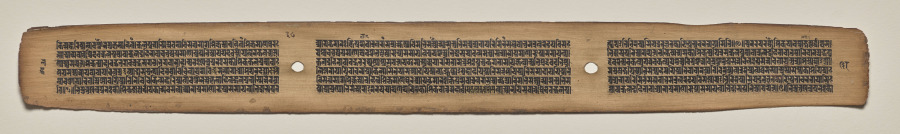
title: Text, Folio 38 (verso), from a Manuscript of the Perfection of Wisdom in Eight Thousand Lines (Ashtasahasrika Prajnaparamita-sutra)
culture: Eastern India, Bihar, Vikramashila Monastery. Painting: Nepal, Kathmandu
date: Sunday, September 14, 1119 (year 239 of the Newar Samvat in the month of Ashvina)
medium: gum tempera and ink on palm leaves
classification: Painting